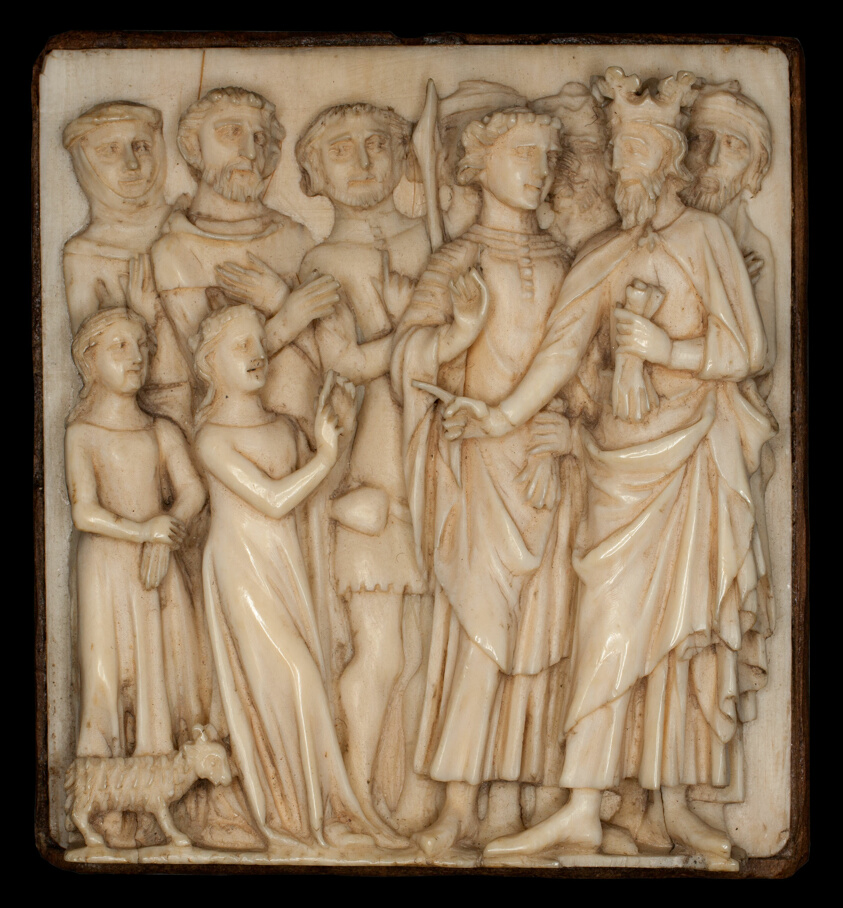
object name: Sculpture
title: Disputation of Saint Catherine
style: nineteenth century, 14th century, 19th century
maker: Artist unknown (Italian, active 19th century)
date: 19th century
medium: Ivory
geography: Italy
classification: ivory; relief; sculpture; Italian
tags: Saint Catherine, men, cat, Christianity, Christian subjects, religion, religious scenes, religious figures, religious, king, woman, saints